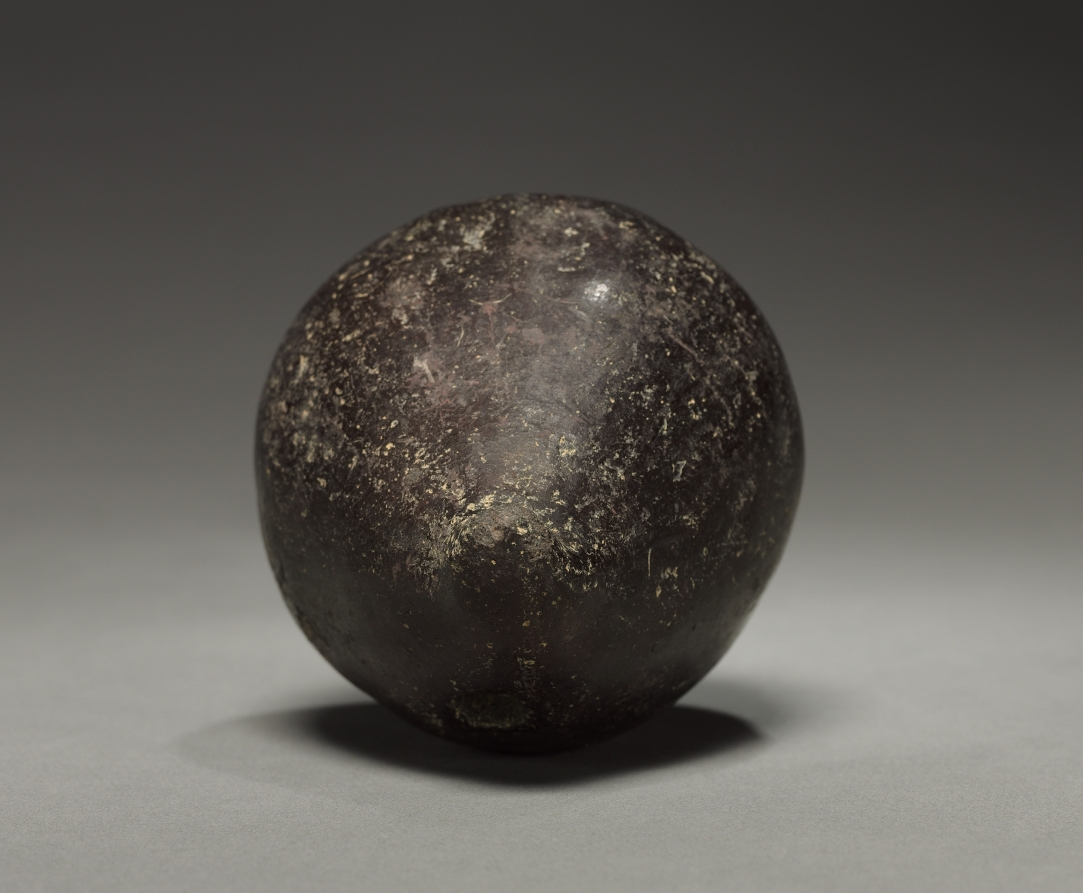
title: Fruit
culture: Colombia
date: before 1921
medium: pottery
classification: Ceramic